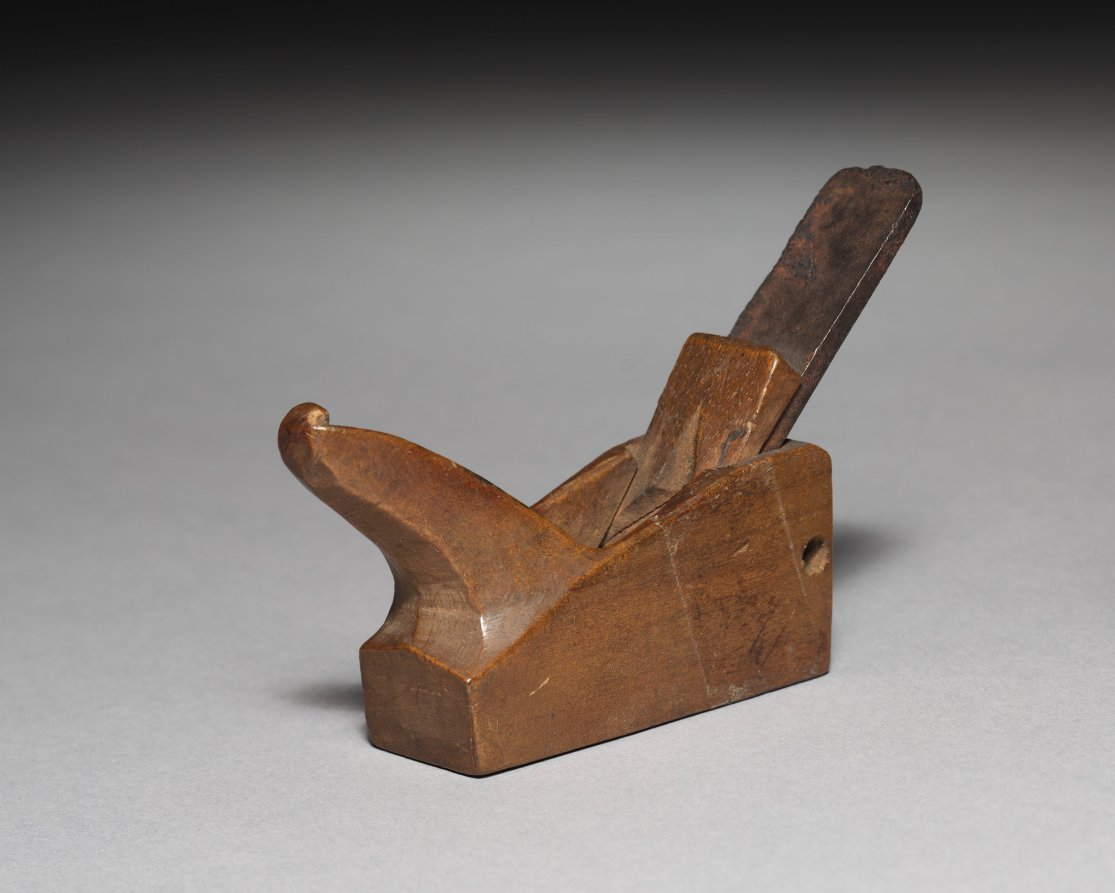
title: Plane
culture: Europe, 18th century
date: 1700s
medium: wood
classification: Tool